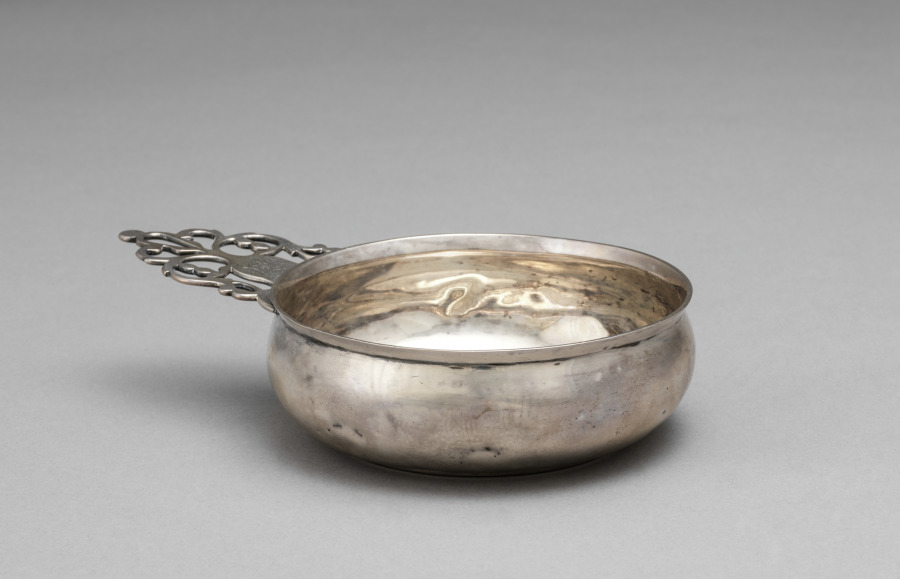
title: Porringer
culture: America, Massachusetts, Newburyport, late 18th-early 19th Century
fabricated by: William IV Moulton (American, 1772–1861)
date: c. 1800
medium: silver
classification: Silver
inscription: engraved "JFS" (or JFT) in bright-cut script on top of handle.